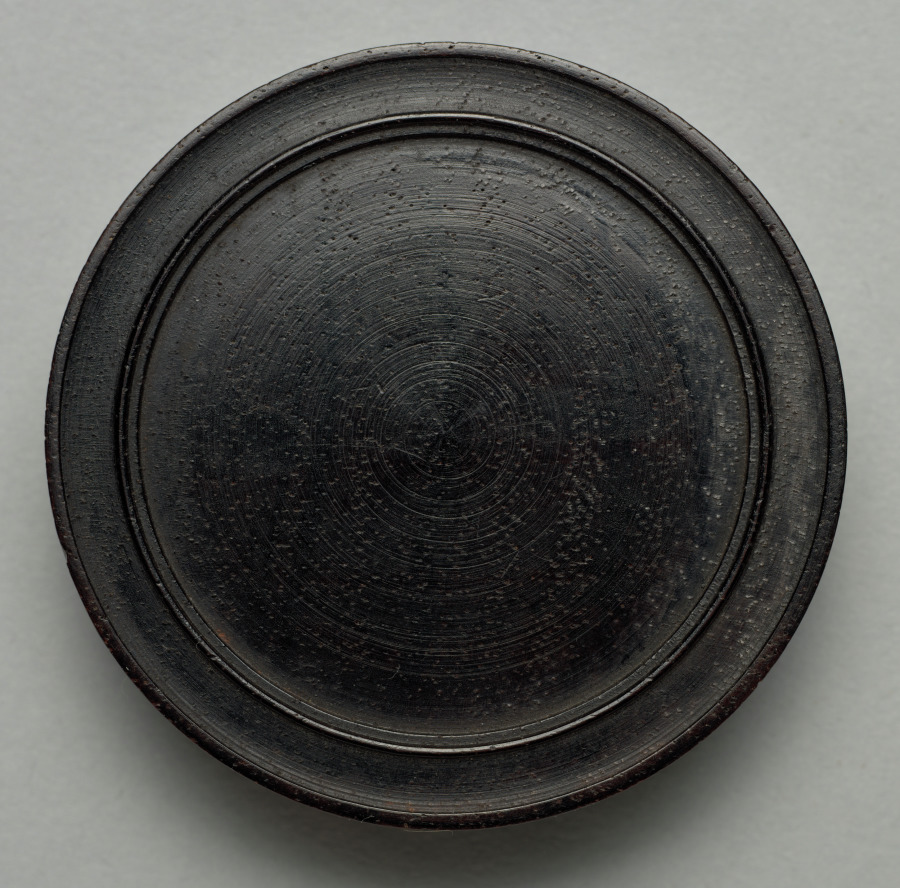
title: Gaming Piece (obverse)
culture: Germany, late 17th-early 18th Century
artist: Martin Brunner (German, 1659–1725)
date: c.1700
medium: wood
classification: Furniture and woodwork